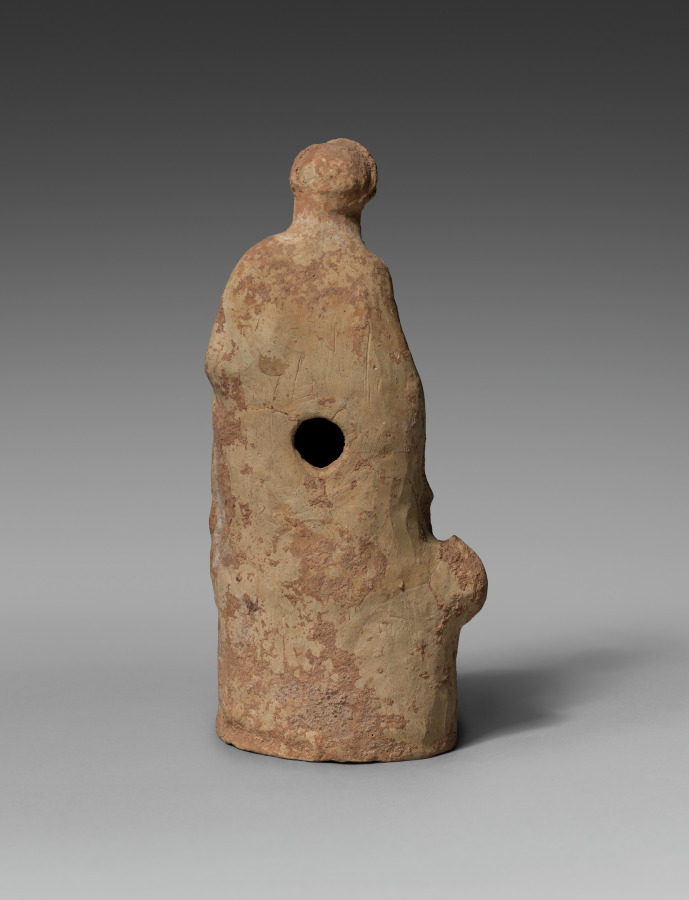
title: Figurine of Demeter with Pig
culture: Greece, Athens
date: 400s BCE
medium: terracotta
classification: Sculpture